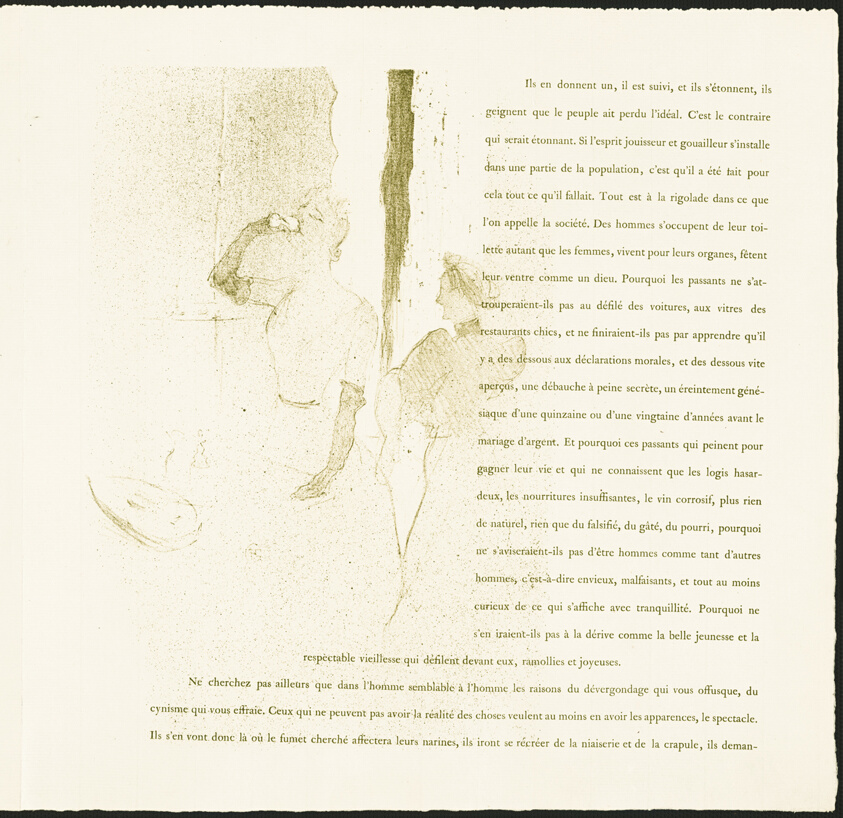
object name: Print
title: Yvette Guilbert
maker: Henri de Toulouse-Lautrec (French, 1864-1901)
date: 1894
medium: Color lithograph, with letterpress, on ivory laid paper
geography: France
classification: lithograph; print; prints and drawing